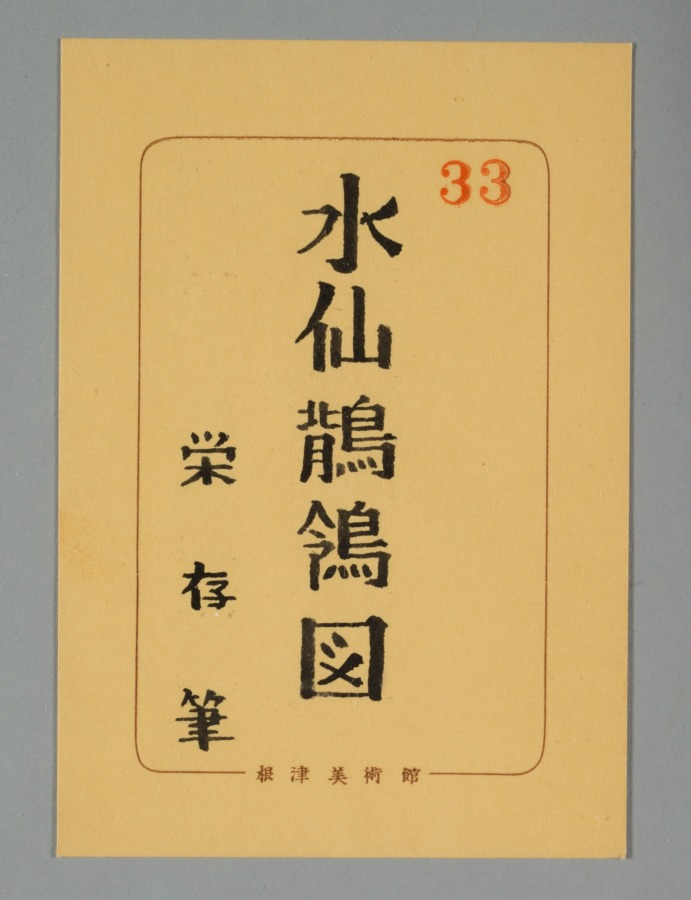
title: Wagtails and Narcissus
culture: Japan, Muromachi period (1392–1573)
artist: Eison (Japanese)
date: mid-1500s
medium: hanging scroll; ink on paper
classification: Painting